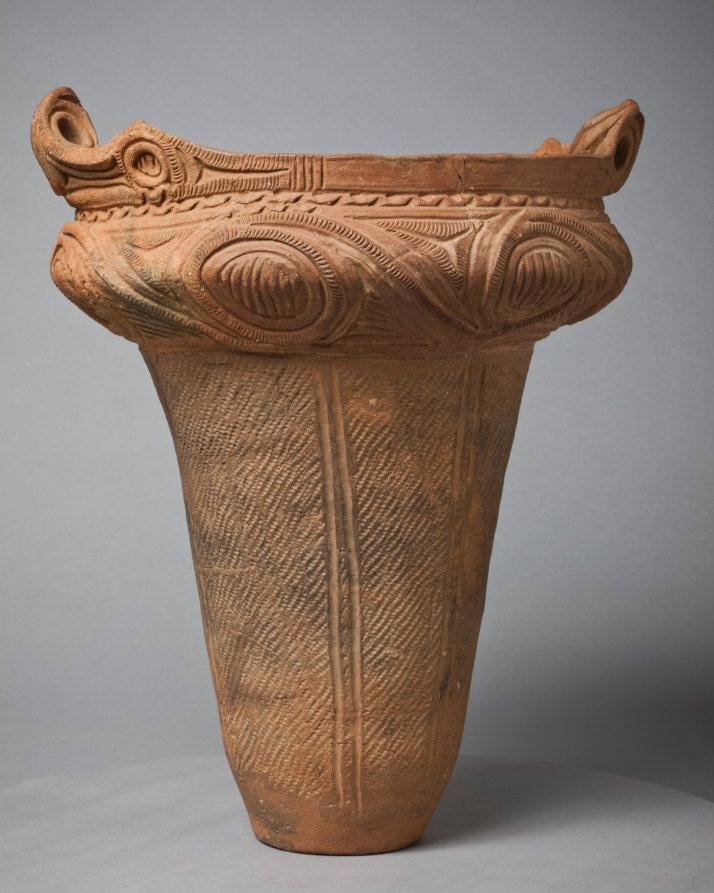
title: Urn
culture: Japan, Jōmon period (c. 10,500–300 BCE)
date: c. 2000 BCE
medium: earthenware, terracotta, impressed and incised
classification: Ceramic